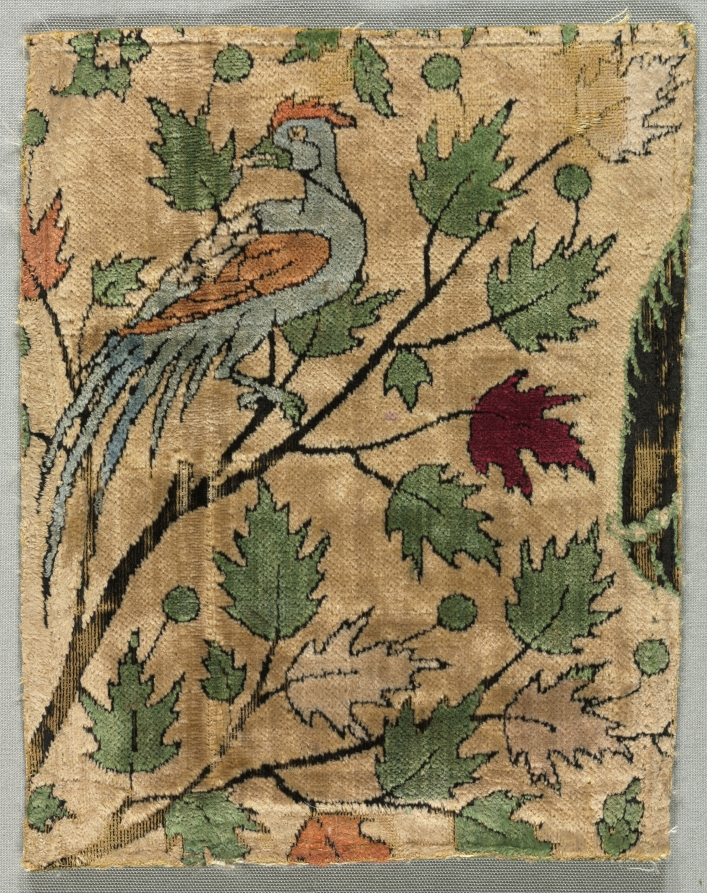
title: Velvet Fragment, Khusrau Sees Shirin Bathing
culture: Iran, Kashan, Safavid period (1501-1722)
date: 1550–99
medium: silk; velvet, cut, pile-warp substitution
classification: Velvet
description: These velvet fragments depict an episode from the Khamsa (Quintet) of Nizami (1141–1209), in which the lovers Khusrau and Shirin first see each other. A pre-Islamic king of Iran, Khusrau has fallen in love with Shirin after seeing her portrait and is traveling to meet her when he happens across her bathing in a stream. Not yet realizing that she is Shirin, Khusrau is transfixed by the woman’s beauty and covets both her and her magnificent black horse. The horse’s mane is just visible here, and she has placed her crown and tunic atop a branch.